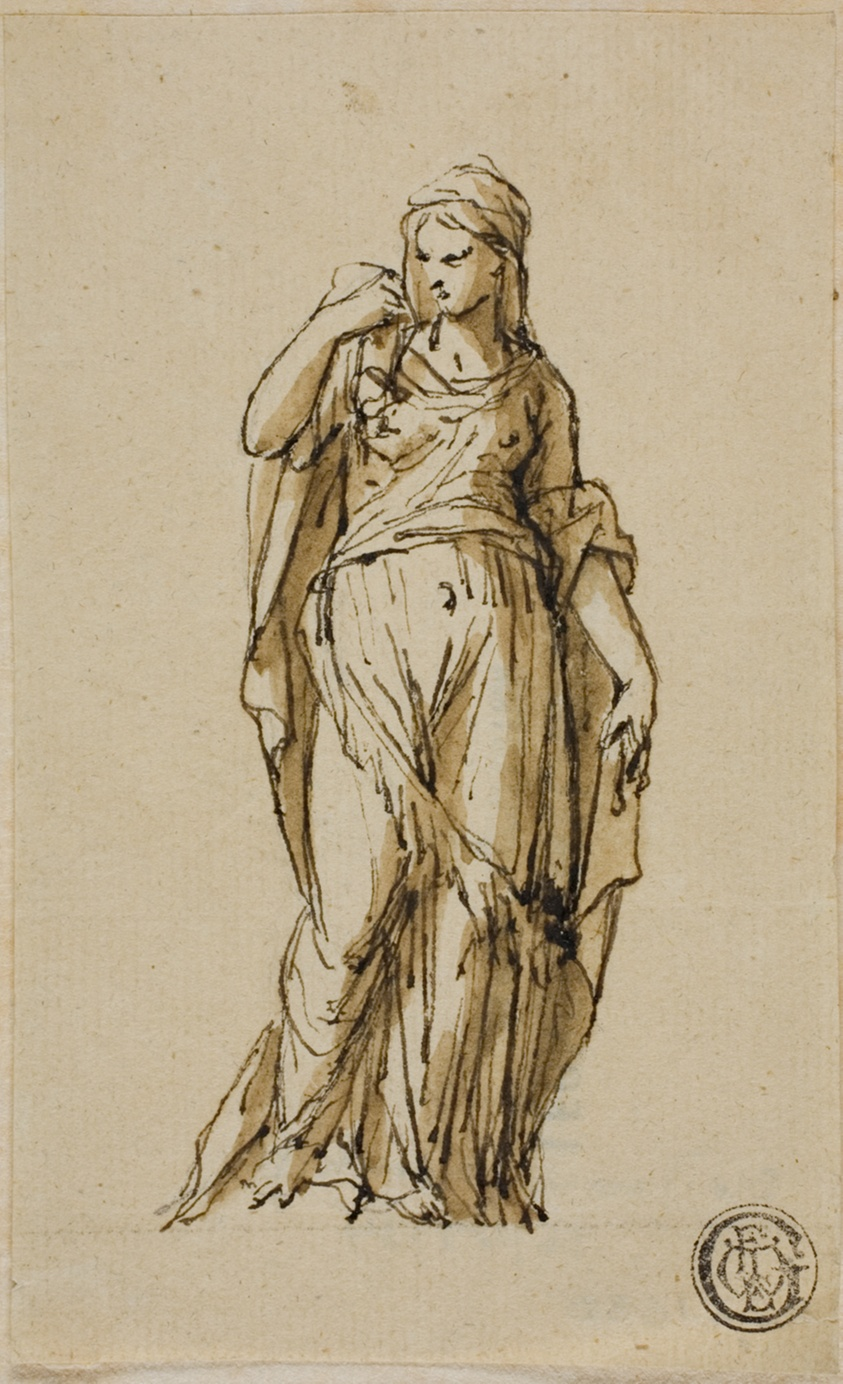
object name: Drawing and Watercolor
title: Standing Female Figure Turning to the Left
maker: John Michael Rysbrack (Flemish, 1693-1770)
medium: Pen and brown ink, with brush and brown wash, over traces of graphite, on cream laid paper, tipped onto ivory laid paper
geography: Flanders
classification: pen and ink drawings; drawings (visual works); prints and drawing